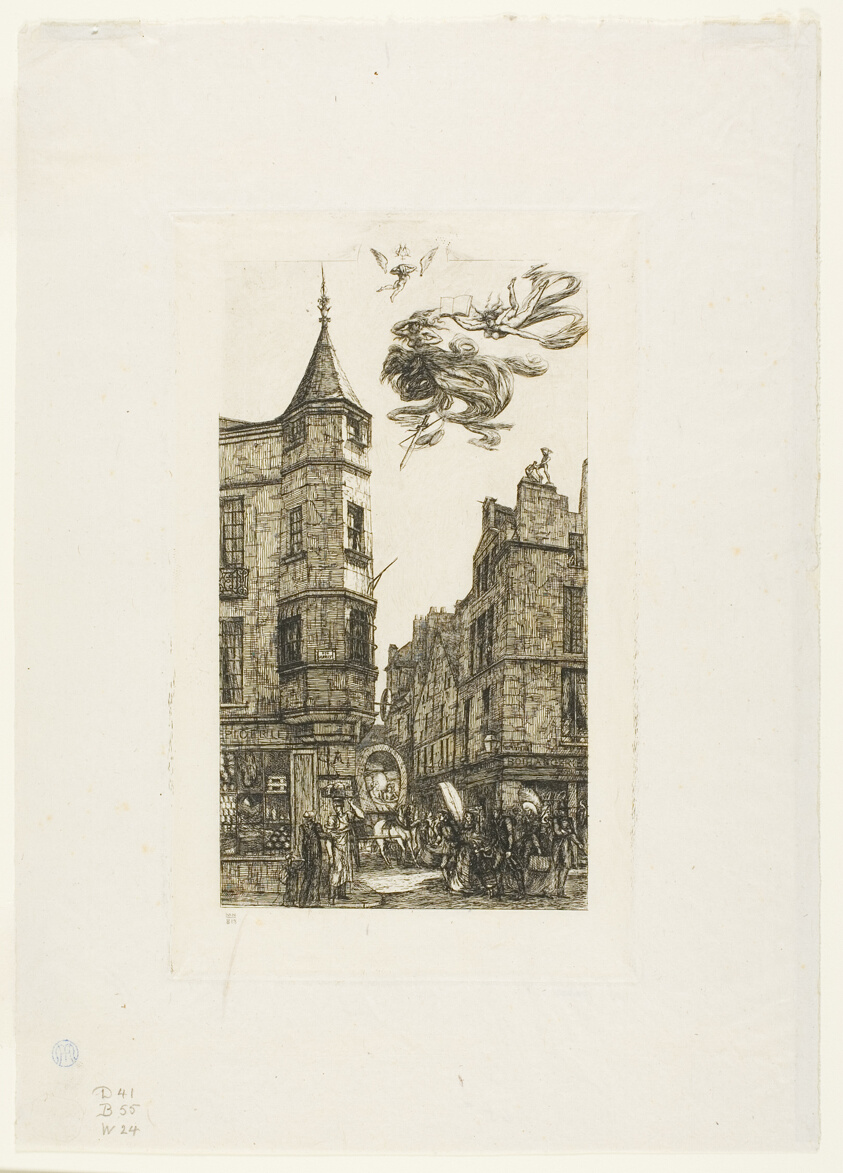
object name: Print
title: House with a Turret, No 22, rue de l'Ecole de Médecine, Paris (called the Turret of Marat)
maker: Charles Meryon (French, 1821-1868)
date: 1861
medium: Etching on ivory laid paper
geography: France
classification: etching; print; prints and drawing